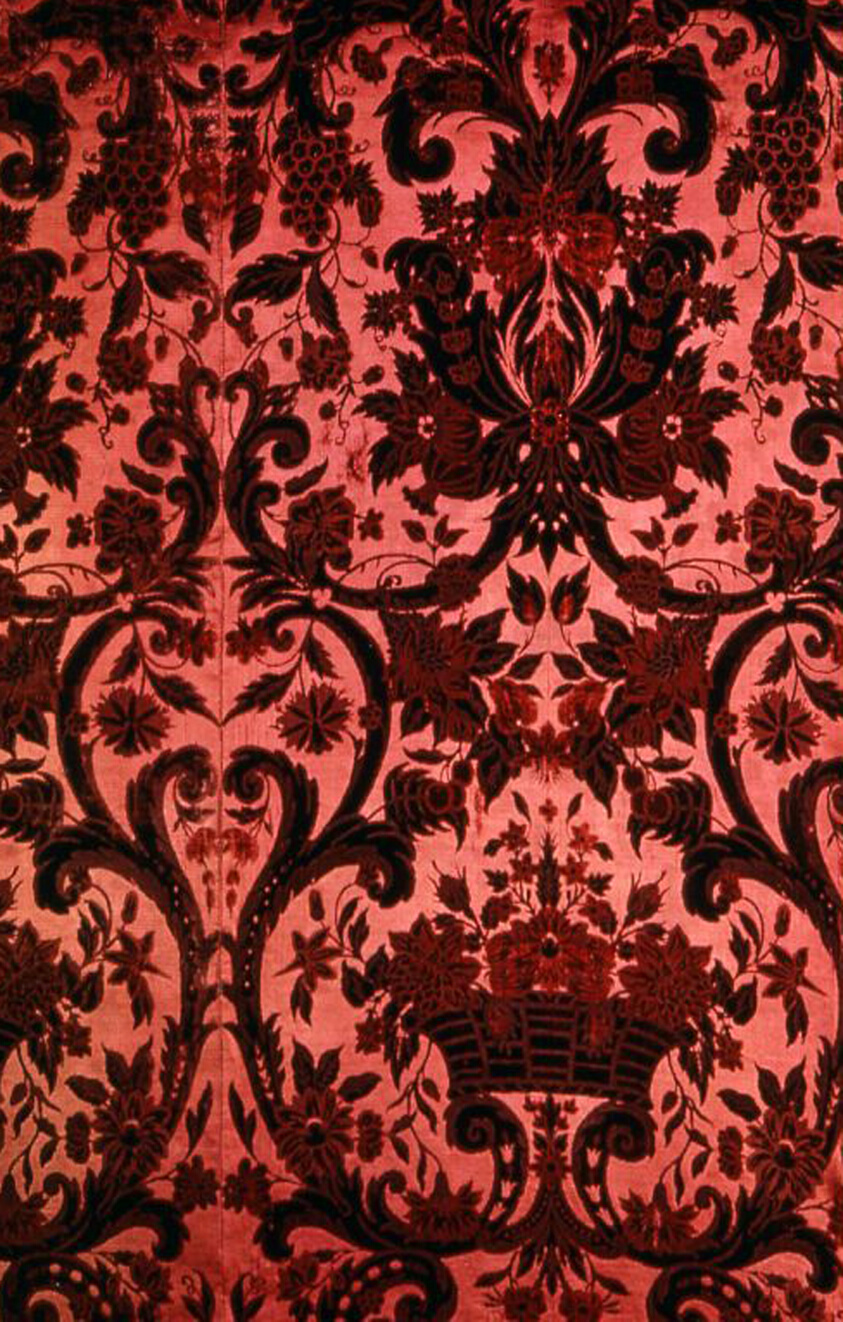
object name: Textile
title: Panel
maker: Italy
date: c. 1725/35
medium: Silk, cut, uncut, voided velvet against satin weave foundation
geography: Italy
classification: textile; weaving - velvet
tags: red (color)